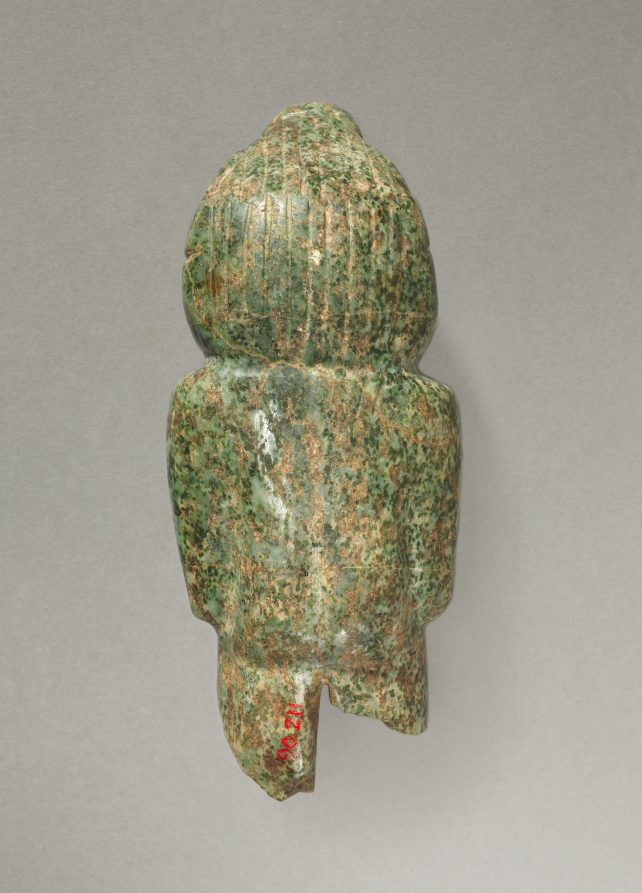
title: Axe-Shaped Figure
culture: Mexico, Oaxaca, Mixteca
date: after 900(?)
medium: Metadiorite (?)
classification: Sculpture